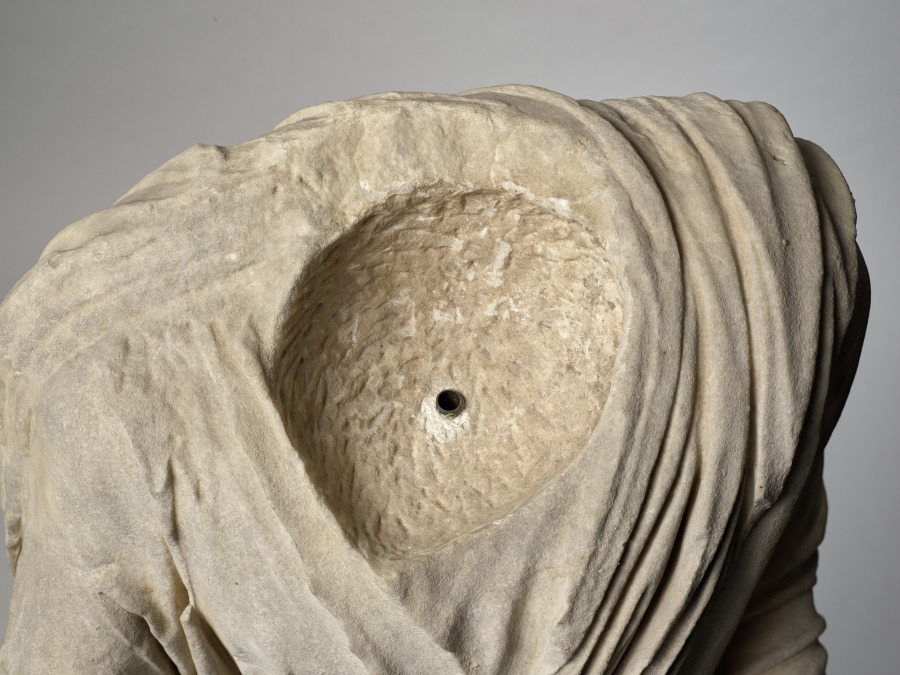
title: Togatus Figure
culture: Italy, Roman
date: 1–200 CE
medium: pentelic marble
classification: Sculpture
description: From 1929 until 1973, this toga-clad body was displayed with a portrait head of Vespasian (recarved from Nero) that did not originally belong to it. Several details indicate a mismatch: the surfaces and proportions differ, and the head projected awkwardly forward even after modern recarving of the neck to fit into the body cavity. Aspects of the toga also suggest that it was sculpted later than the head.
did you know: This body once included a separately made head and arms.